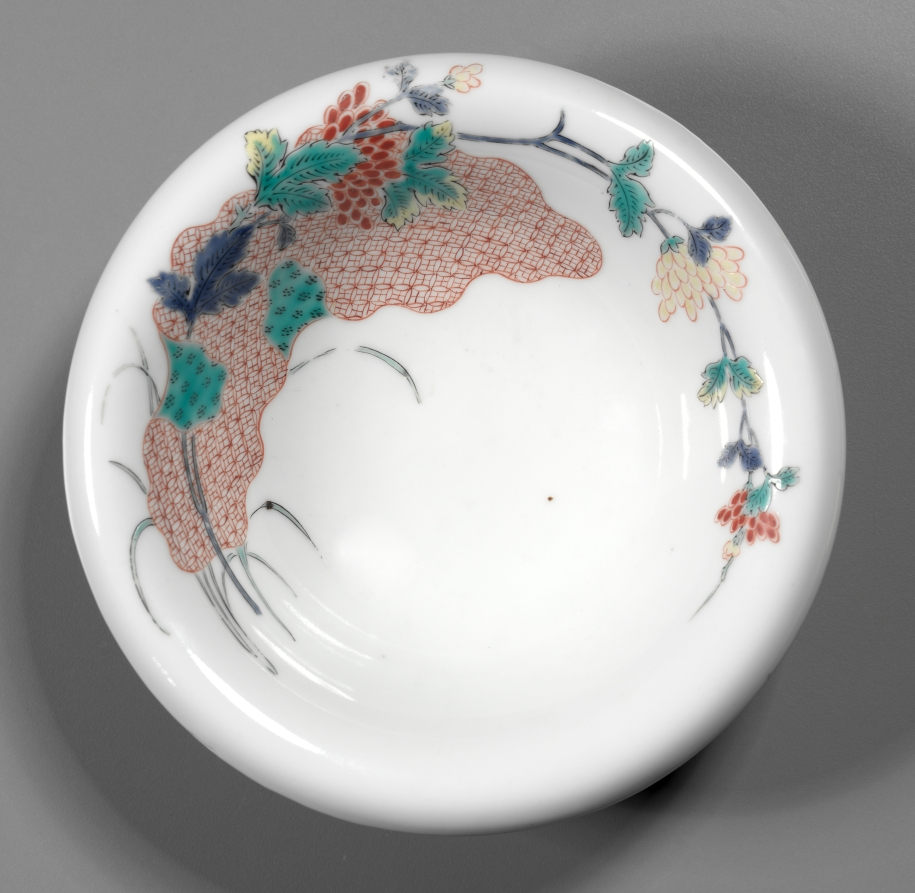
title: Bowl with Floral Spray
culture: Japan, Edo period (1615–1868)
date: early 1700s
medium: porcelain with overglaze color enamel (Hizen ware, Kakiemon type)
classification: Ceramic